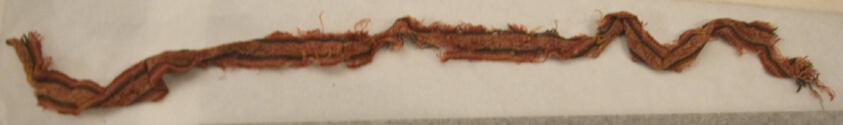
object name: Textile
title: Fragment (Band)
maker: Peru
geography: Peru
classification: textile; weaving